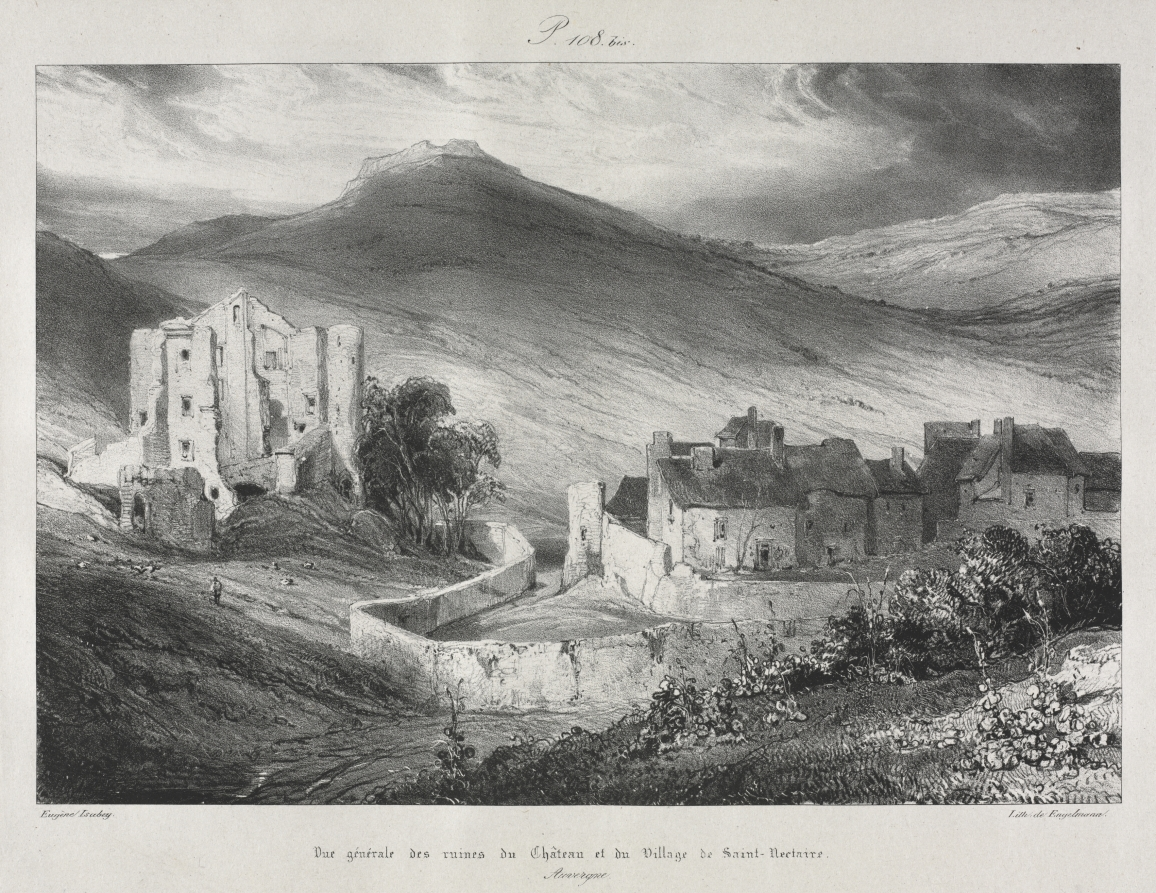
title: Voyages pittoresques et romantiques dans l'ancienne France, Auvergne: Ruines du château et du village de Saint Nectaire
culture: France, 19th century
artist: Eugène Isabey (French, 1803–1886)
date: 1831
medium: lithograph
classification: Print